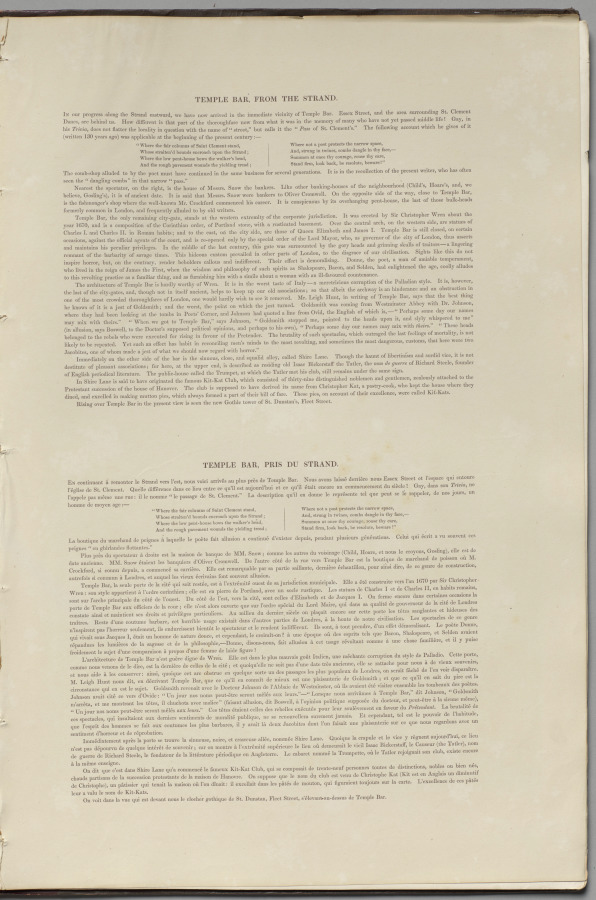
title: London As It Is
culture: England, 19th century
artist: Thomas Shotter Boys (British, 1803–1874)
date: 1842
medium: lithograph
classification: Bound Volume